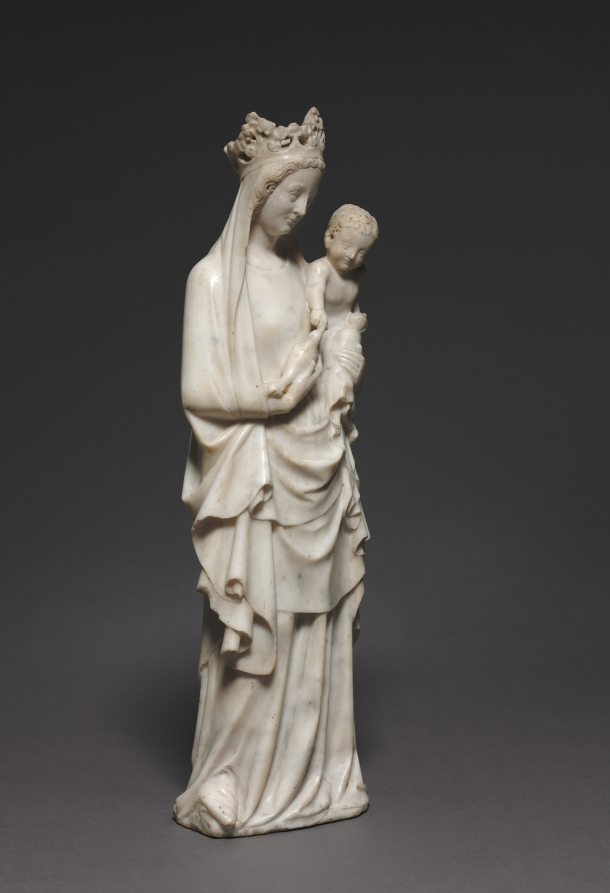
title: Virgin and Child with a Bird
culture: France, Île-de-France, Paris, 14th century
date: c. 1350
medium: marble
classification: Sculpture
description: The Virgin and Child represents one of the most frequent subjects for free-standing sculpture in 14th-century France, motivated by the developing cult of the Virgin and increasing veneration of Mary. Such sculptures were not restricted to churches, but were also found in roadside shrines, entrances to towns, and domestic use in private chapels. The small scale of this statuette suggests it was made for private veneration. The bird, held in the Virgin’s right hand, was a well-known symbol of the human soul and represents Christ’s role as redeemer of humankind.